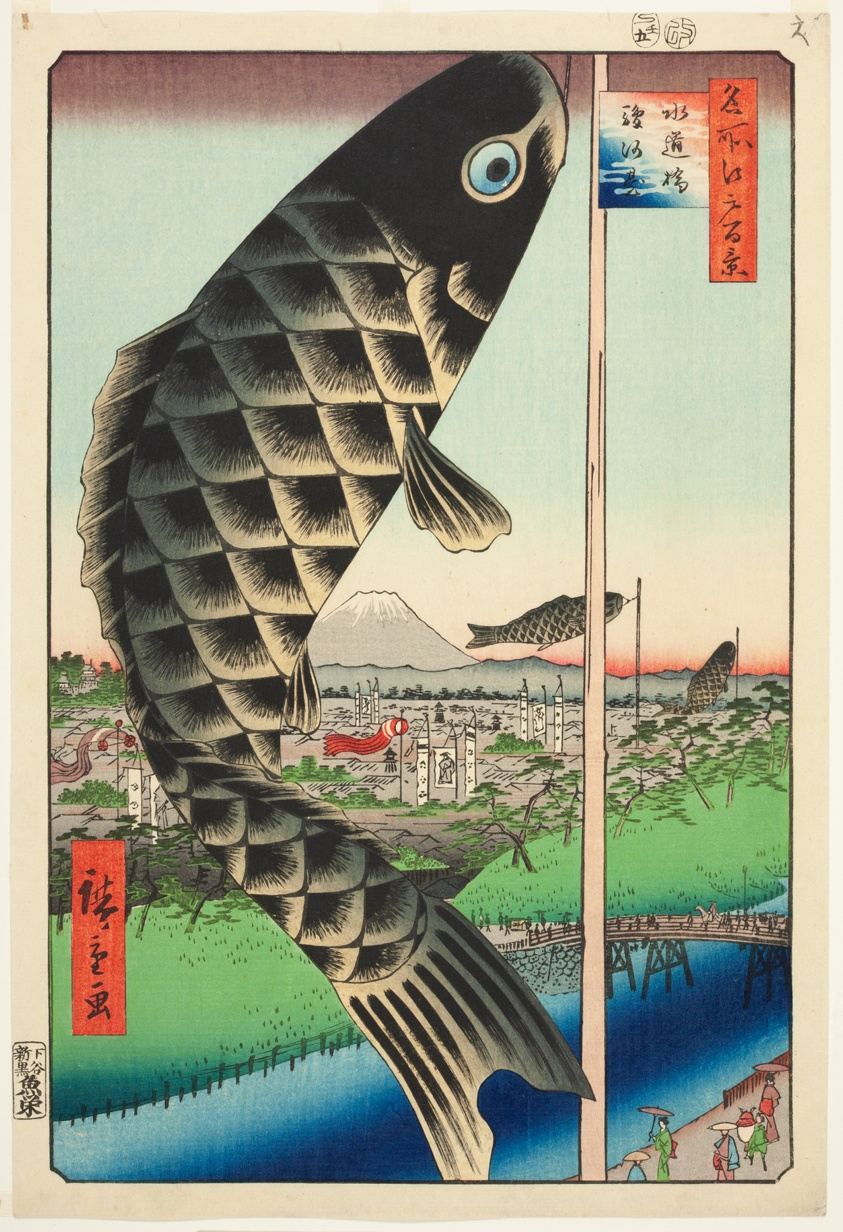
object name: Print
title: Suido Bridge and Surugadai (Suidobashi Surugadai), from the series "One Hundred Famous Views of Edo (Meisho Edo hyakkei)"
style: Japanese (culture or style)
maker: Utagawa Hiroshige 歌川 広重; Japanese, 1797-1858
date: 1857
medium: Color woodblock print; oban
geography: Japan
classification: woodblock print; print; asian art